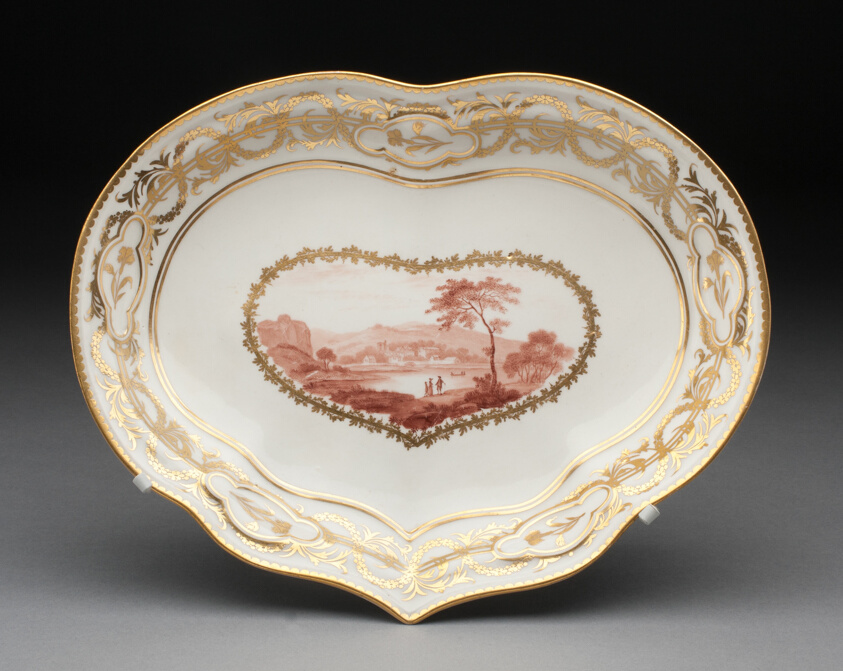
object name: Ceramics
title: Dish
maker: Derby Porcelain Manufactory (England, 1750-1848)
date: 1780/95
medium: Soft-paste porcelain, brown grisaille and gilding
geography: Derby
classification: dish (vessel); porcelain; european decorative arts; ceramics